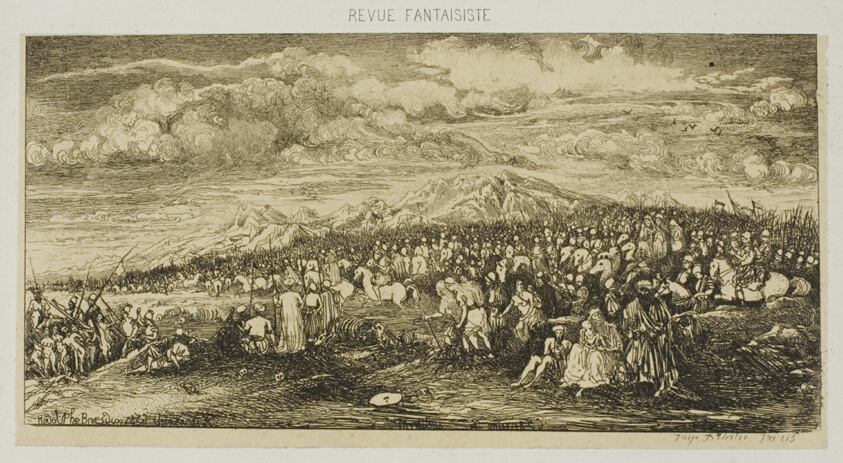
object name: Print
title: The Roman Army, from Revue Fantaisiste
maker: Rodolphe Bresdin (French, 1825-1885)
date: 1856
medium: Etching on cream China paper laid down on white wove paper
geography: France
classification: etching; print; prints and drawing